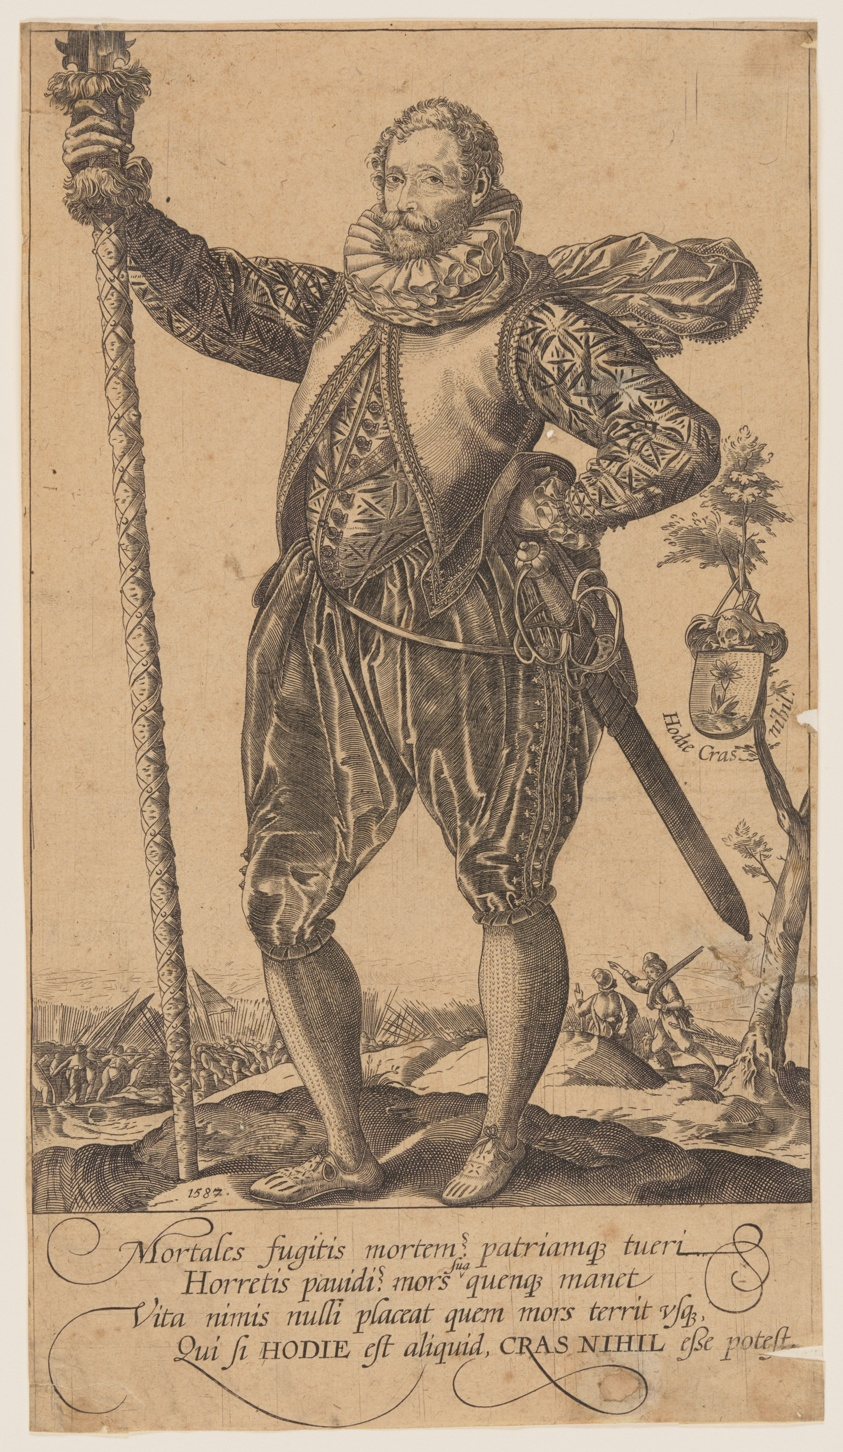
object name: Print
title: A Pike-Man Turned to Left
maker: After Hendrick Goltzius; Dutch, 1558–1617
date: 1587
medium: Engraving on cream laid paper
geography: Netherlands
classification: engraving; paper; print; prints and drawing